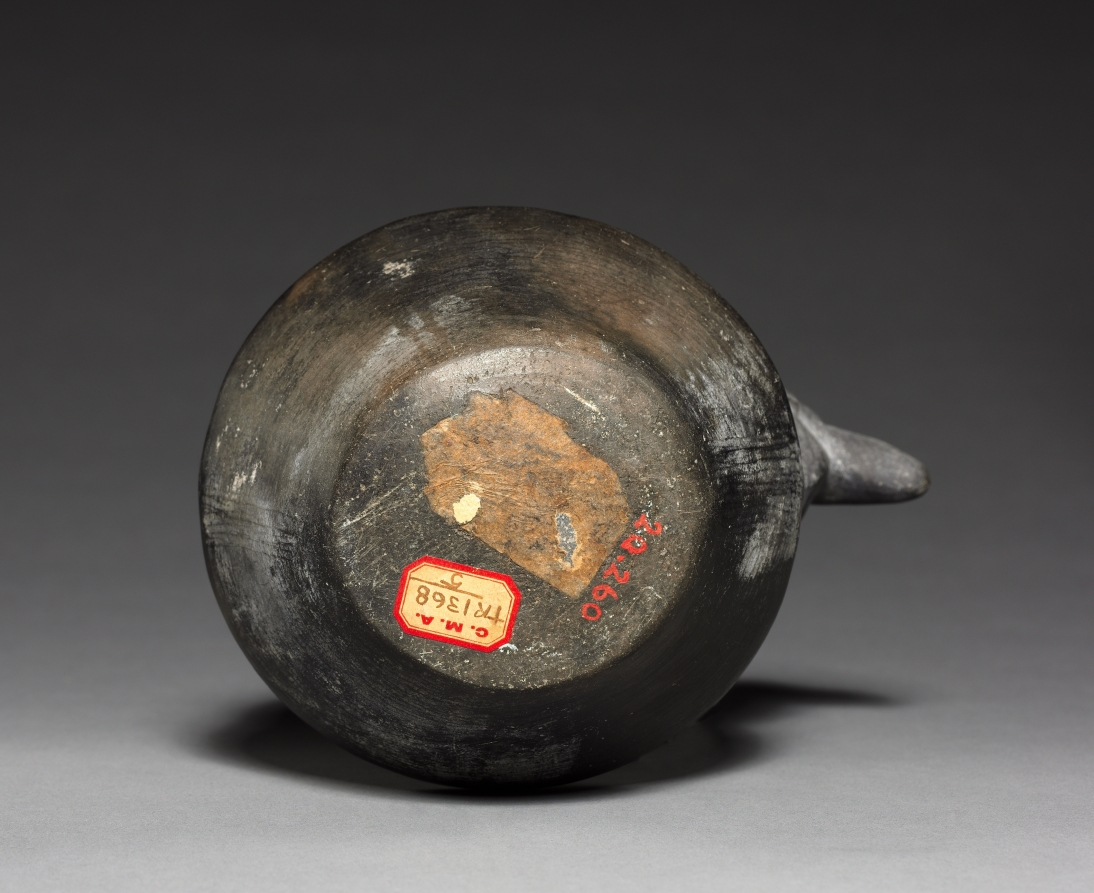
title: Vessel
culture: Peru, Chimú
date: 1300–1400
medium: black ware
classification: Ceramic